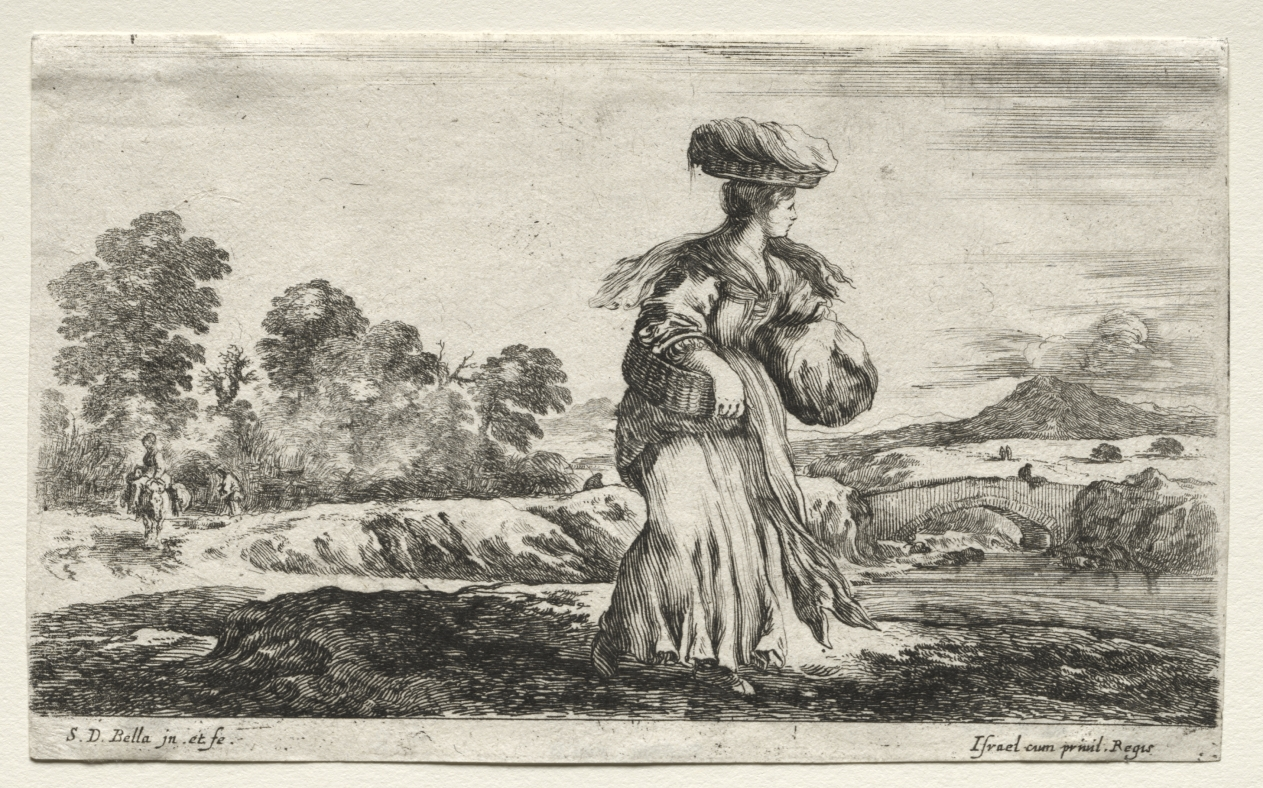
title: Various Figures and Landscapes: Peasant Woman Carrying a Basket on her Head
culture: Italy, 17th century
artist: Stefano Della Bella (Italian, 1610–1664)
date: 1649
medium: etching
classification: Print